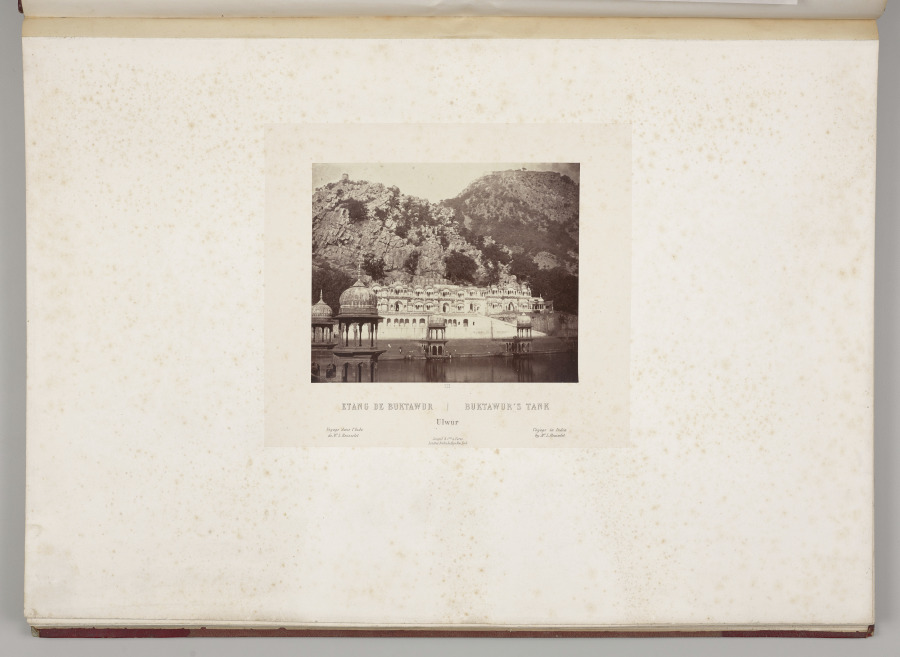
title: Buktawur's Tank, Ulwur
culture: France, 19th century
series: India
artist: Louis-Théophile Marie Rousselet (French, 1845–1929)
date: 1865–68, published 1869–70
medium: Albumen print from glass plate negative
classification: Photograph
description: Concerned that his drawings did not do justice to the splendor of India’s monuments, Rousselet learned photography in India that year, a remarkable accomplishment. He proved to be a talented photographer with a sophisticated sense of composition. The scenes in this volume sweep across sites of Sultanate, Rajput, and Mughal power in northern India, from the sacred Hindu city of Varanasi on the Ganges River to Alwar in Rajasthan. Also included are several scenes of industry and portraits of Indian rulers.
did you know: Louis Rousselet described himself as a “scientific traveler” when he went to India alone at age 18 in 1863 and stayed into 1868.